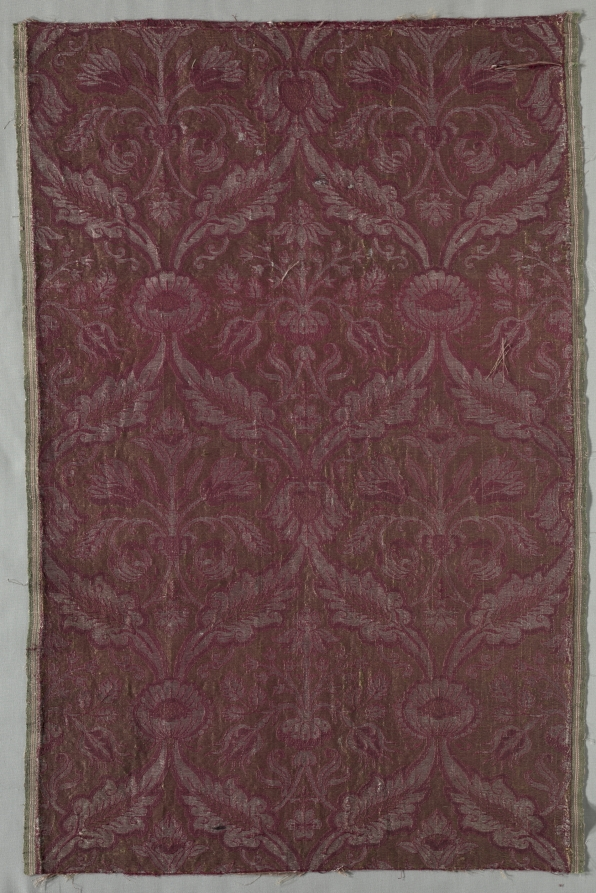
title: Textile with Flora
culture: Italy or Spain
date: c. 1500s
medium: silk, linen, silver thread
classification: Textile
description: This luxurious furnishing fabric might have been a wall covering or part of a long robe. The pattern of floral bouquets framed by curved leaves was popular in Italy, Spain, and Turkey during the 16th century. Darkened by oxidation, the fine silver weft, or horizontal, threads would have once shone brightly and glittered in the flickering candlelight that illuminated rooms before electricity. The preserved selvage edges reveal the width of the original loom; the edge’s color and style may even indicate the quality of the silk thread and the identity of the guild that wove it.